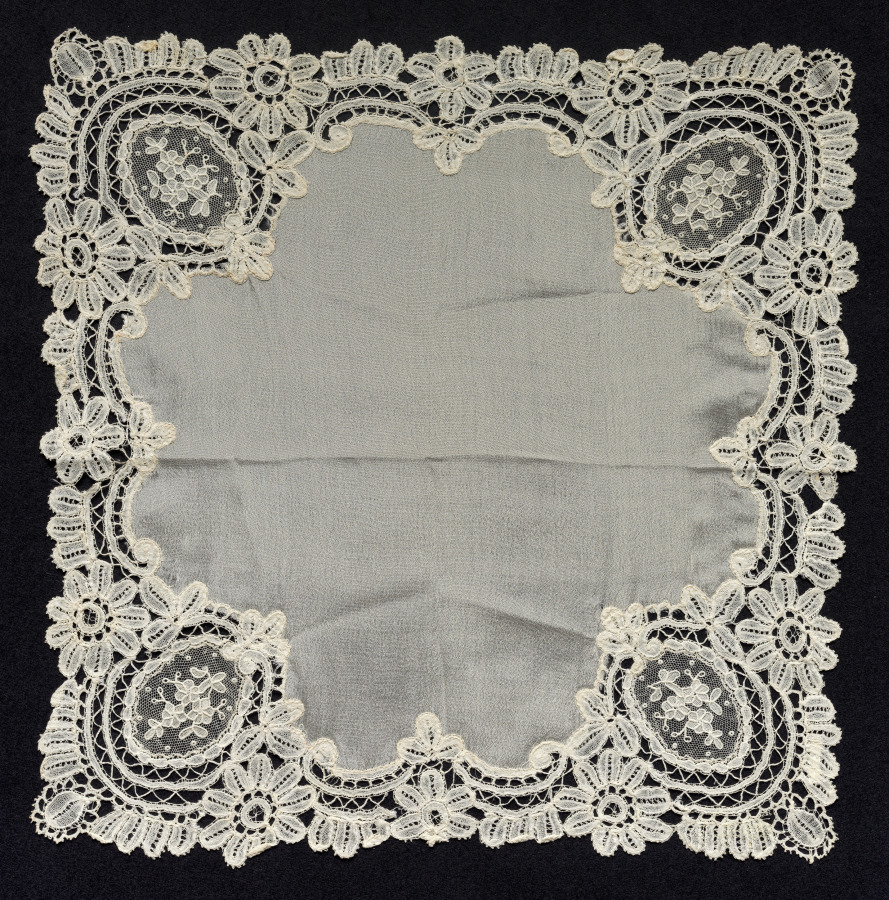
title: Lace Handkerchief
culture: Belgium, Brussels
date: 1900–1935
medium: Crêpe de chine center with border of bobbin lace (Duchesse lace) and needle lace (point de gaze)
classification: Lace